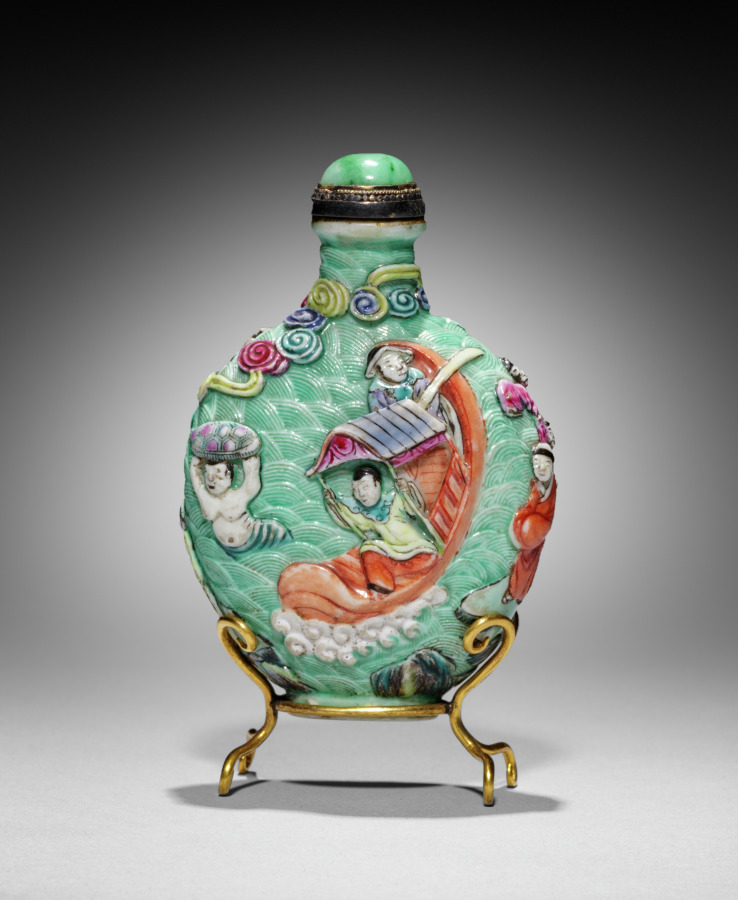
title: Flattened Ovoid Snuff Bottle with Stopper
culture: China, Qing dynasty (1644-1911), Jiaqing reign (1796-1820)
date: 1796–1820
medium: porcelain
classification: Ceramic